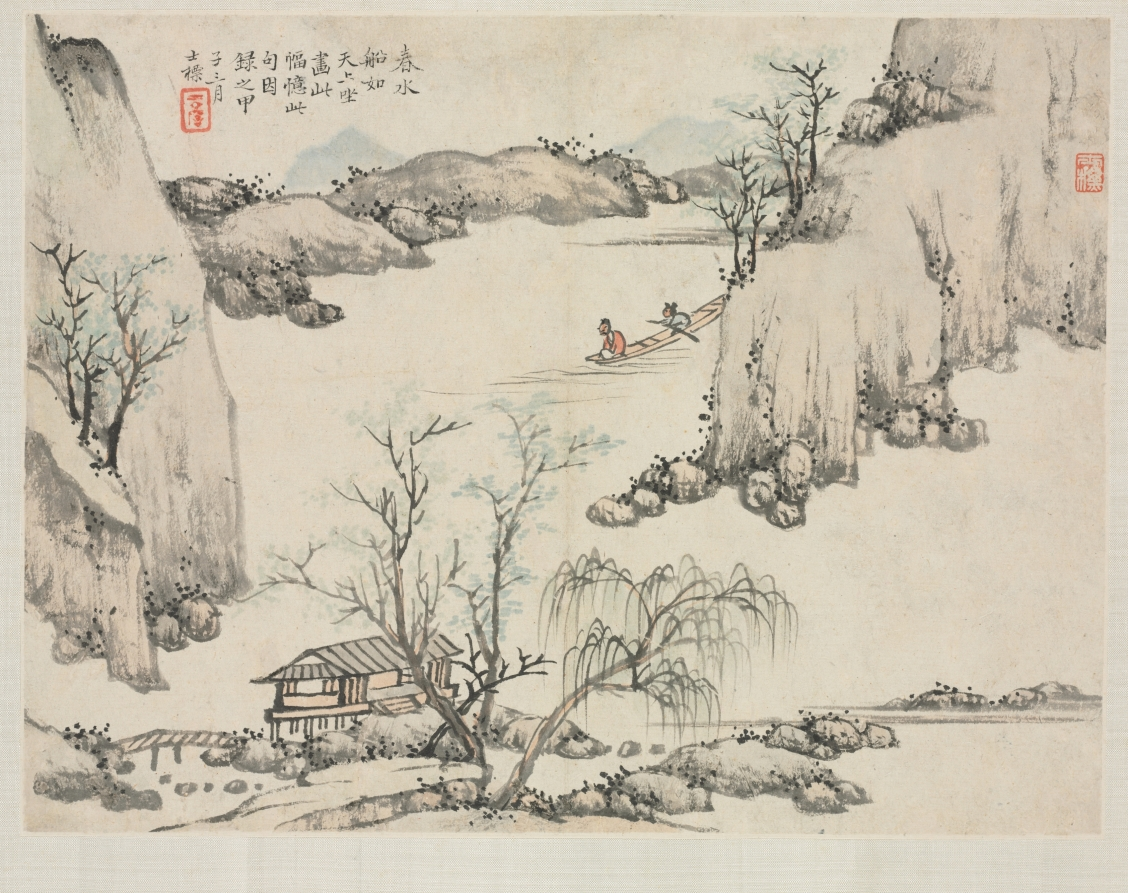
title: Landscape Album in Various Styles: Boating in Spring Water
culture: China, Qing dynasty (1644-1911)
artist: Zha Shibiao (Chinese, 1615–1698)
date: 1684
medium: album leaf, ink and light color on paper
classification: Painting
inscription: Artist's inscription, signature, and seal: "Boating in spring water is like sailing in the sky" [from a poem by Lu Yu, 1125-1210]. While painting this, I thought of the quotation and thus recorded it. The third month of the jiazi year [1684]. Shibiao [seal] Erzhan. [seal, upper right] Shibiao.